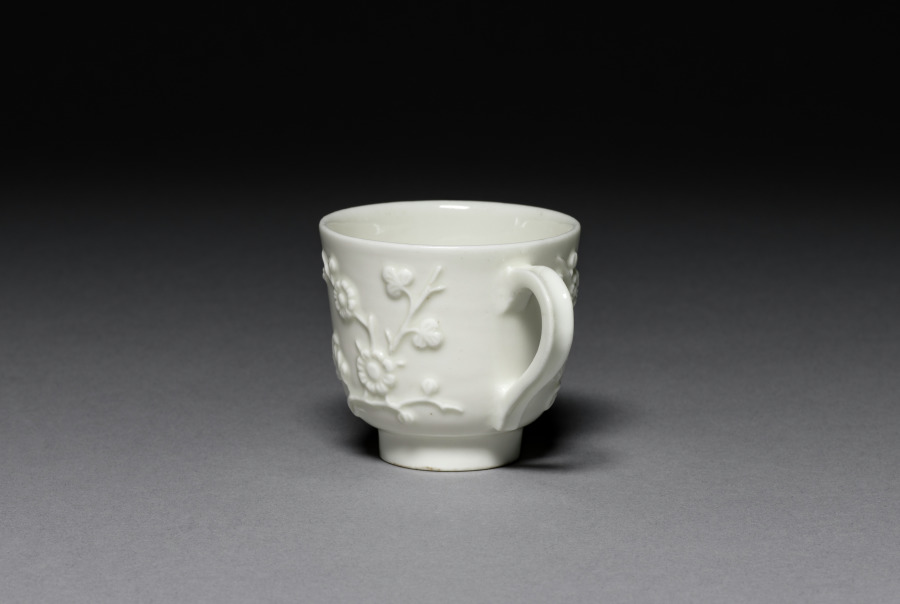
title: Cup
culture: France, 18th century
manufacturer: Saint Cloud Porcelain Factory (French)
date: 1775–1799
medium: soft-paste porcelain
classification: Ceramic